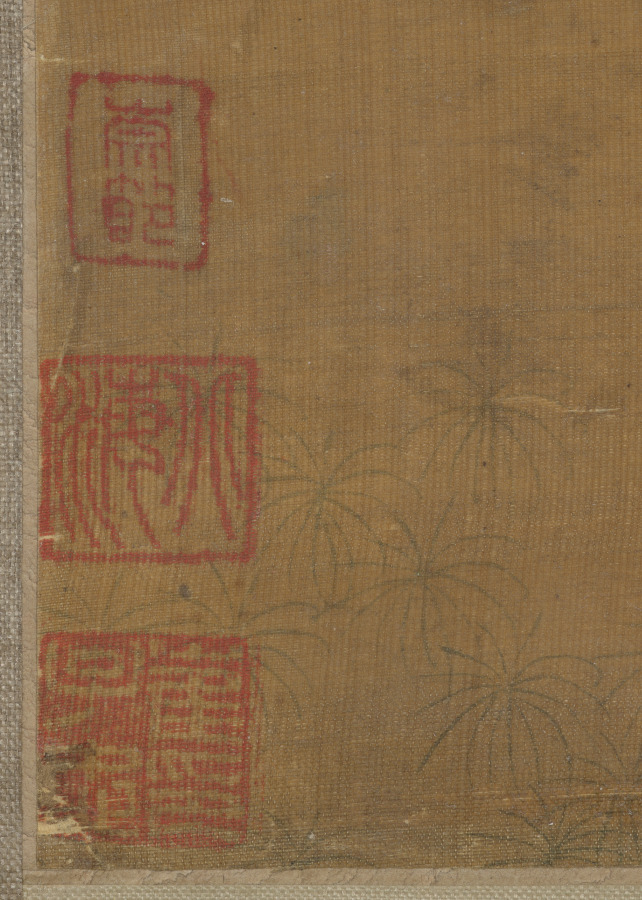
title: Xu Jingyang Moving His Family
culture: China, Ming dynasty (1368–1644)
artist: Cui Zizhong (Chinese, 1574–1644)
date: 1644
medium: Hanging scroll; ink and color on silk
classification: Painting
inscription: Artist's 2 seals: Pei-hai, Cui Zizhong yin.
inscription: 9 additional seals: 2 of Xiang Yuan (18th-19th c.); 1 of Tang Zuomei (late 18th-19th c.); 1 of Zhang Heng 張珩 (1915-1963); 1 of C. C. Wang 王季遷 (1907–2003); 4 unidentified.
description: Xu Jingyang was a dedicated fourth-century Confucian official who allegedly turned into a Daoist immortal. This scroll depicts the legend that when he attained immortality, he took his entire household, including chickens and dogs, to paradise. Cui Zizhong’s painting style intentionally referenced ancient masters. Typical of the pre-Song dynasty landscape tradition, there is the use of blue and green colors and an emphasis on outline rather than texture. While the trembling outlines are reminiscent of earlier painters, the flickering light on rocks and trees is a stylistic feature of Cui’s own time.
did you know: Xu Jingyang, wearing red, is in the upper register of figures, while below his servants transport a rooster, dog, and other supplies.